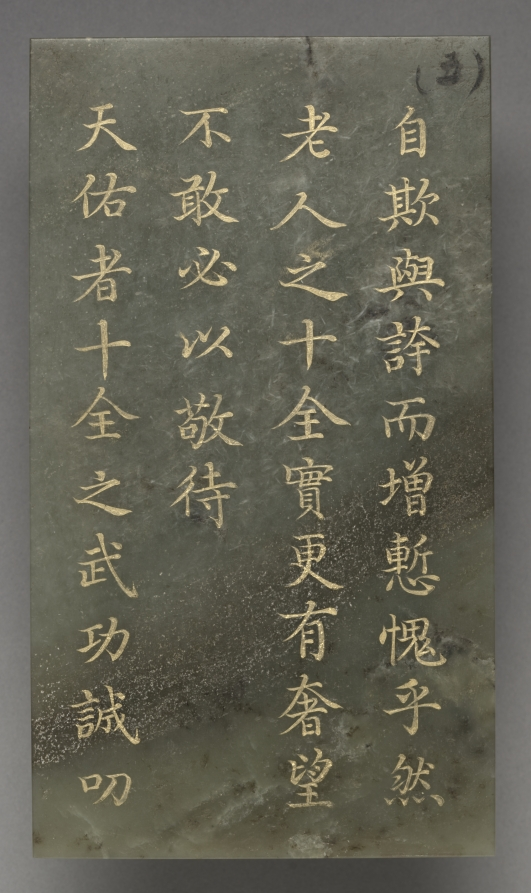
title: Tablet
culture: China, Qing dynasty (1644–1911), Qianlong reign (1736–95)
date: 1778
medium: jade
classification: Jade